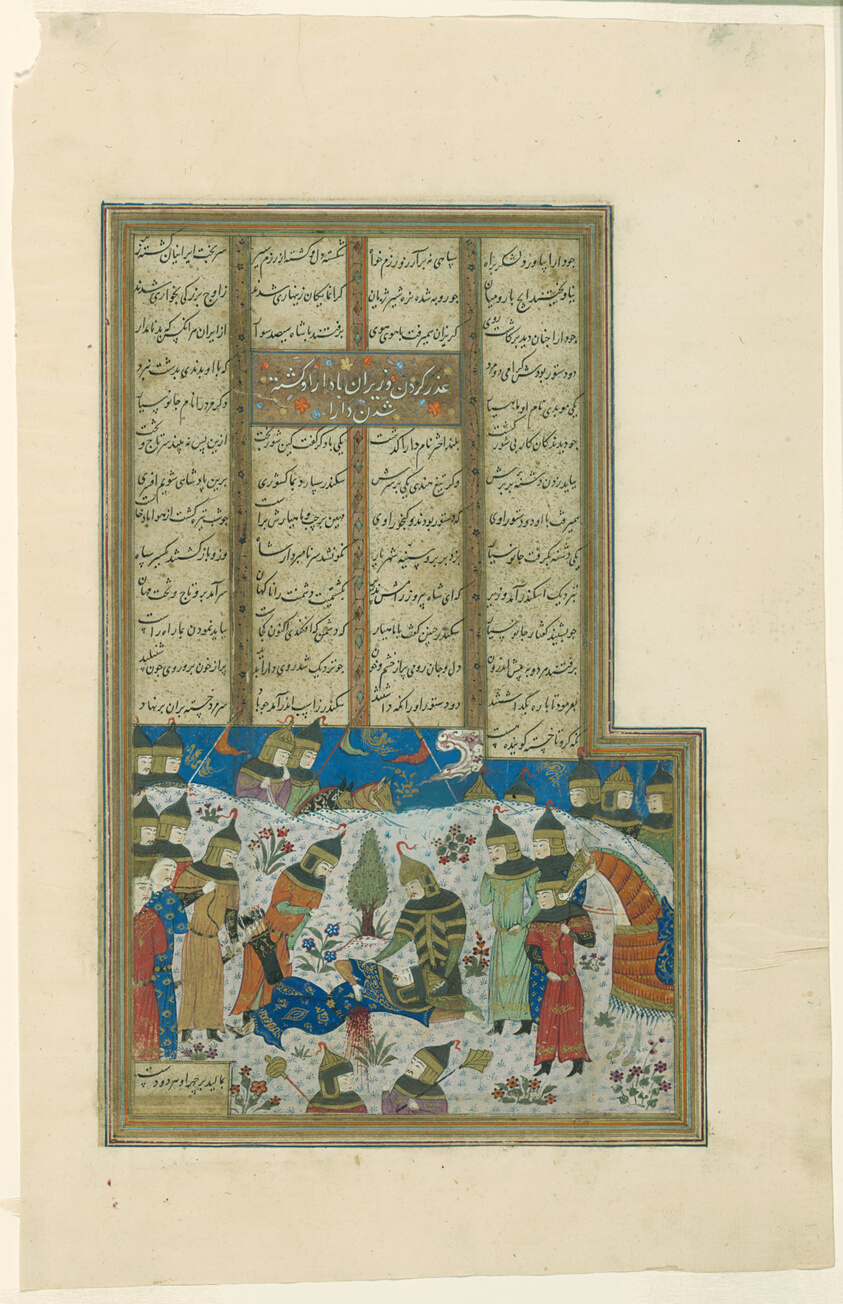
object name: Painting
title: Alexander Comforts the Dying Darius, page from a copy of the Shahnama of Firdausi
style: Islamic (culture or style)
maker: Iran; Turkmen style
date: Timurid dynasty (ca. 1370–1507), c.1480/90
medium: Opaque watercolor and ink on paper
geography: Iran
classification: miniature painting; manuscript; asian art; painting